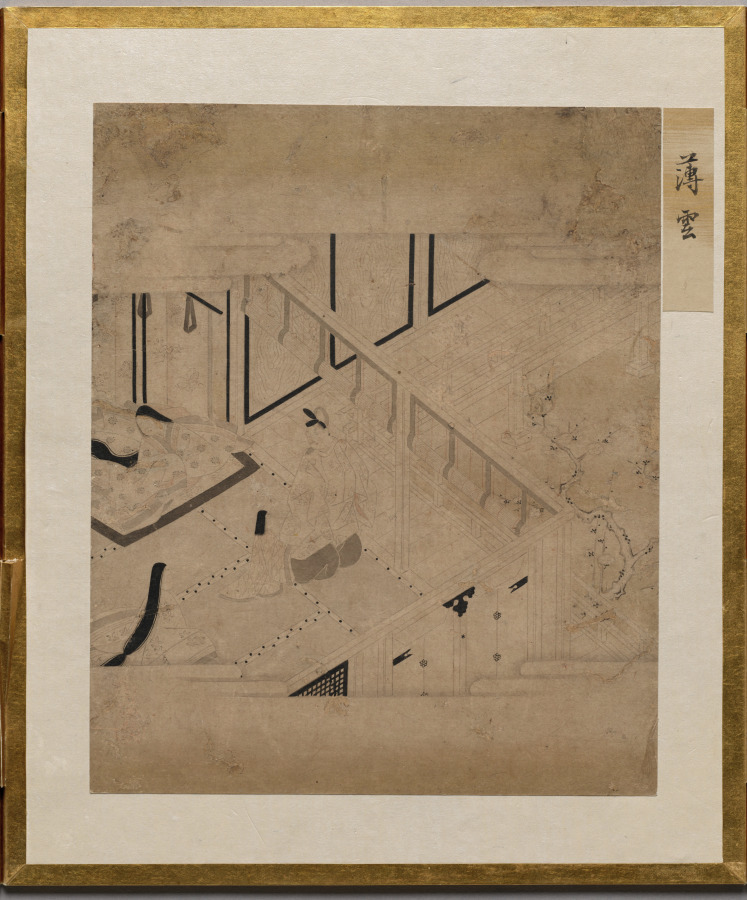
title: Rack of Clouds from Album of Illustrations for the Tale of Genji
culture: Japan, Edo period (1615–1868)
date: 1600s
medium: painting in an accordion-style album; ink, light color, and gold on paper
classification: Bound Volume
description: This album contains illustrations for the classic literary work the Tale of Genji, authored in the 1000s by Murasaki Shikibu, an aristocrat of the Heian period (794–1185) court. The scenes are painted in the “white drawing” (hakubyō) mode, in which a fine ink line is used to depict figures and spaces with great subtlety, punctuated only occasionally by traces of red pigment for a character’s lips, a detail of a garment, or a decorative element. These two scenes illustrate episodes from the chapters “Thin Veil of Cloud” (Usugumo) and “Barrier Gate” (Sekiya).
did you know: The illustrations are identified by chapter title in cartouches to the upper right of the paintings.